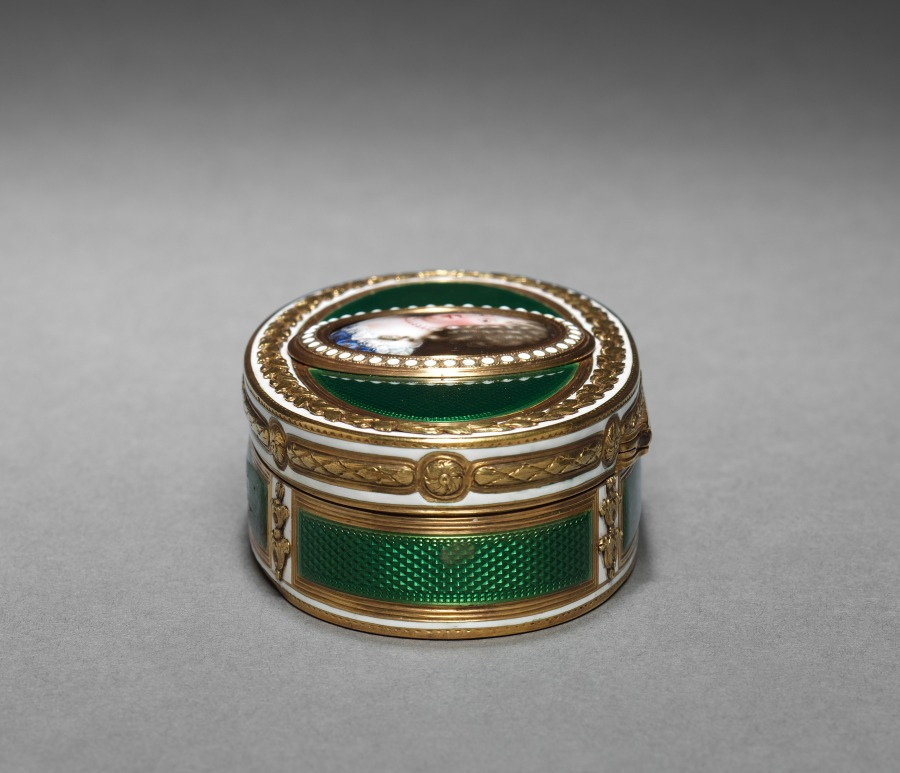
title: Snuff Box (Tabatière) with Portrait of Marie-Thérèse of Austria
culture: France, 18th century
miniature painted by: Jean Petitot (Swiss, 1607–1691)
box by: Charles Le Bastier (French)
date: miniature, c. 1676; box, 1775–76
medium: Gold, enamel, and miniature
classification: Enamel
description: In 18th-century France, ornately enameled boxes that held snuff—powdered tobacco—became a popular accessory in the French court. This box is decorated with a miniature portrait of Marie-Thérèse of Austria, the queen consort of French King Louis XIV. Their union was largely political. A year into their marriage Louis XIV took an official mistress, Madame Pompadour.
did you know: This box resulted from the combined efforts of the popular portrait painter who served the court of French King Louis XIV, Jean Petitot, and master goldsmith Charles Le Bastier.